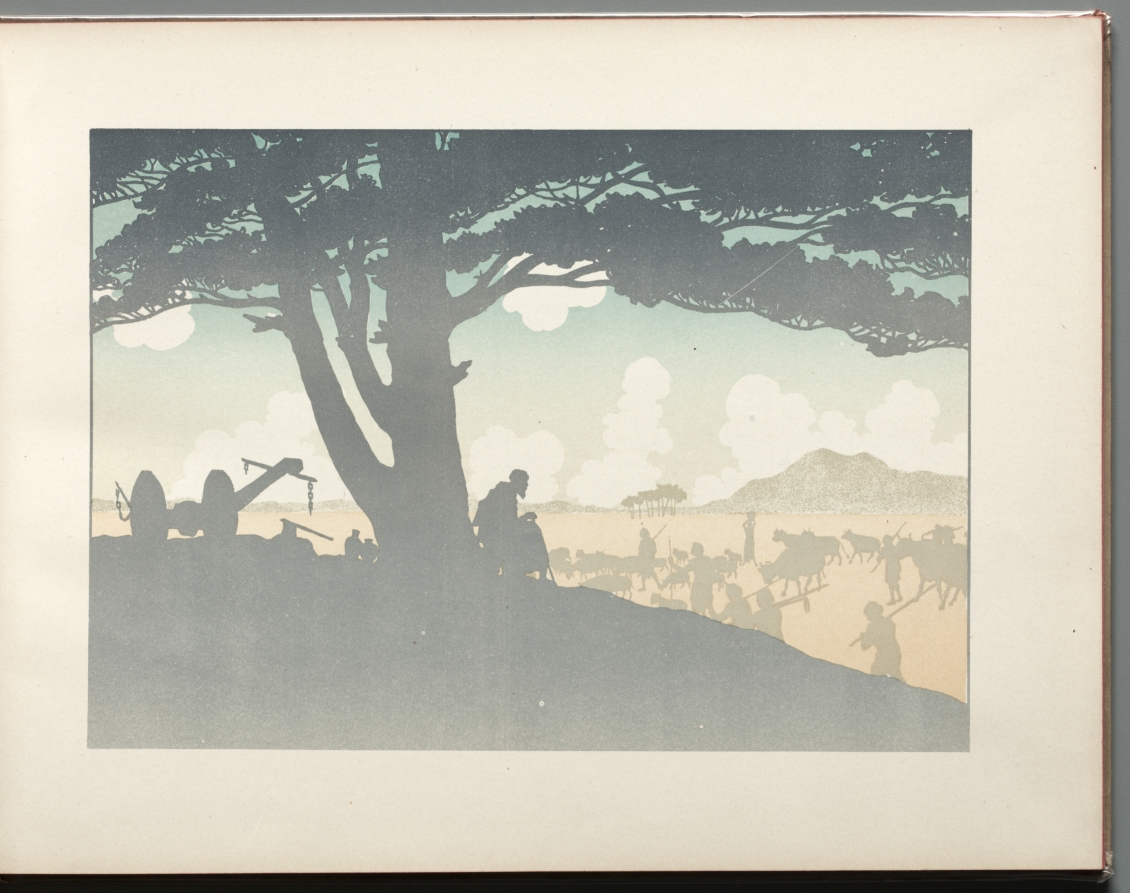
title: The Prodigal Son: Premier Tableau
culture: France, 19th century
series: Bound Volume illustrating the poetry and music of Georges Fragerolle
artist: Henri Rivière (French, 1864–1951)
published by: E. Flammarion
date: 1895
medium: 15 color lithographs in a bound volume illustrating the poetry and music of Georges Fragerolle: color lithograph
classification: Bound Volume